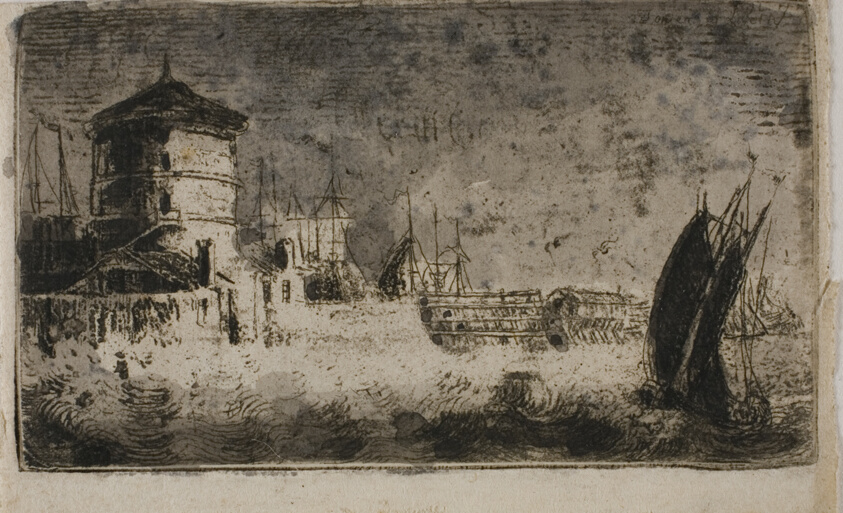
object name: Print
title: Old Tower, Leith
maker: John Clerk of Eldin (Scottish, 1728-1812)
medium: Etching on paper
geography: Scotland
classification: etching; print; prints and drawing